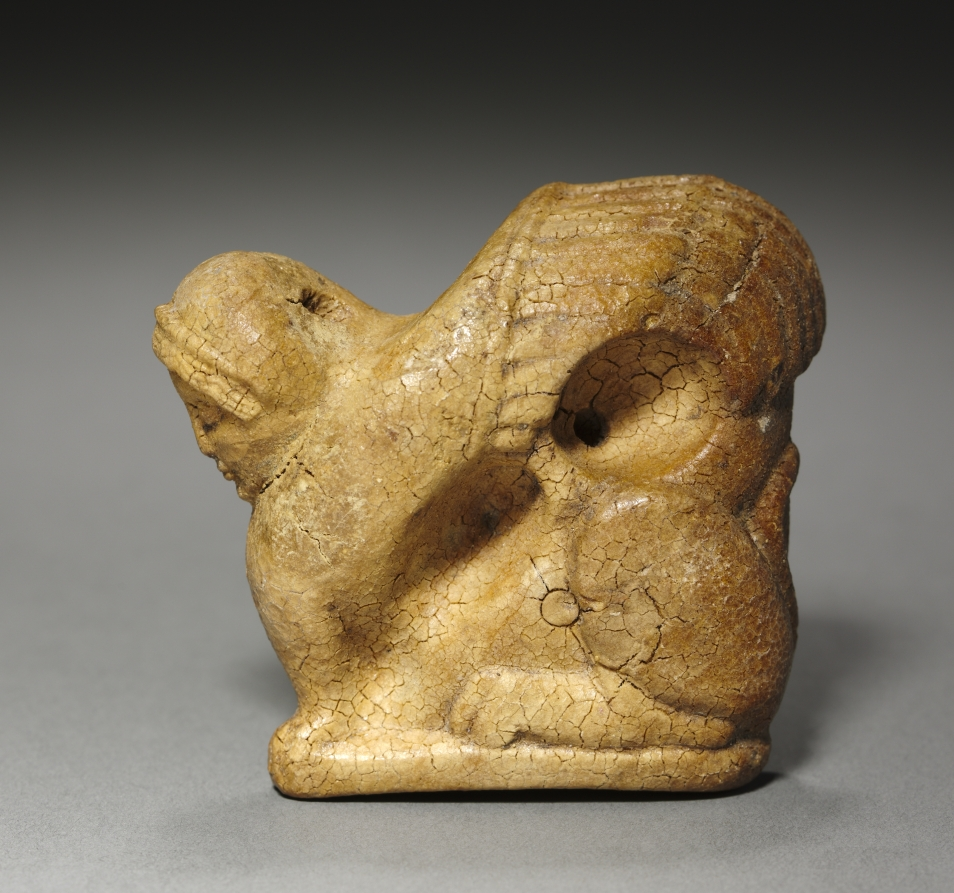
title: Sphinx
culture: Greek/South Italian, Taranto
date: c. 500 BCE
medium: amber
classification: Sculpture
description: Amber, a form of fossilized tree resin, was much prized in the ancient Mediterranean world, perhaps due to its mysterious luminosity, fragrance, and magnetism. It was often carved into figures or heads of humans, animals, or mythical creatures. Small perforations on this sphinx suggest that it may once have been mounted, perhaps for use as a pendant. Although now opaque and crackled due to age, in antiquity the surface probably exhibited some degree of translucence, a valued attribute for amulets and ornaments.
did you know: A sphinx combines the body of a winged lion with the head of a woman.